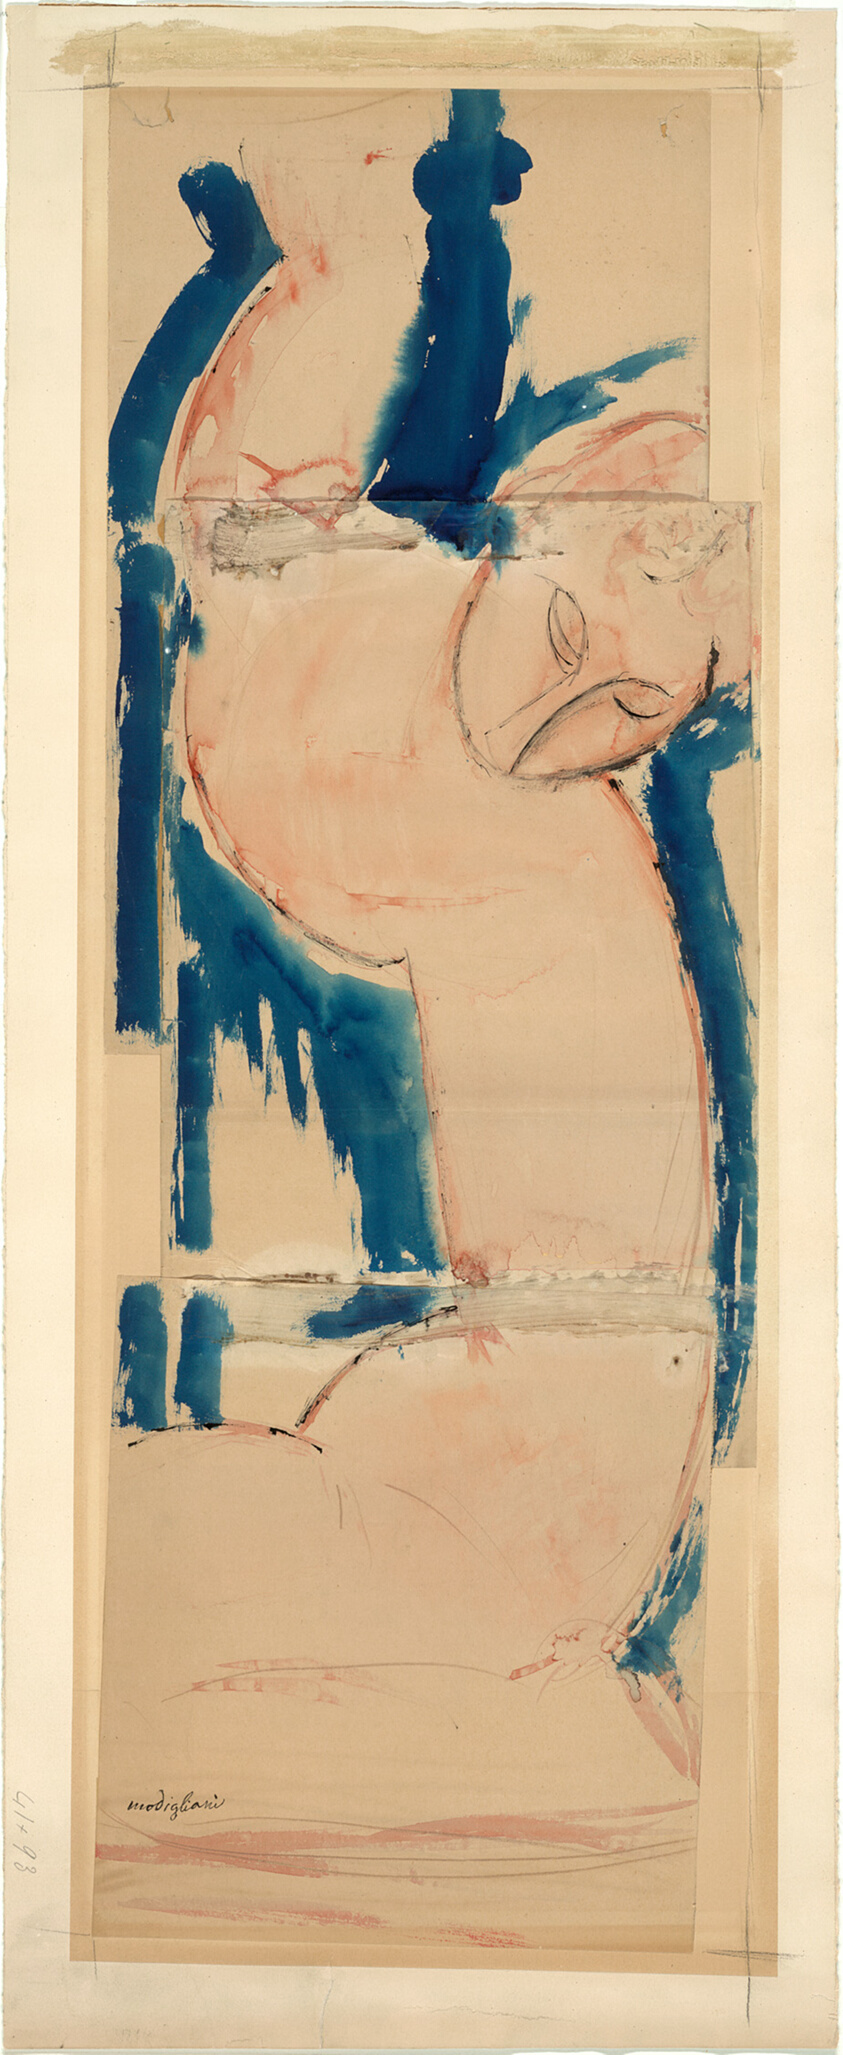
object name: Drawing and Watercolor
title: Caryatid: Rose and Blue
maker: Amedeo Modigliani (Italian, 1884-1920)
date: 1912–14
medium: Watercolor, with pen and black ink, graphite, and touches of brown crayon on tan wove paper (pieced), laid down on tan wove paper, laid down on cream wove paper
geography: Italy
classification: watercolor; drawings (visual works); prints and drawing